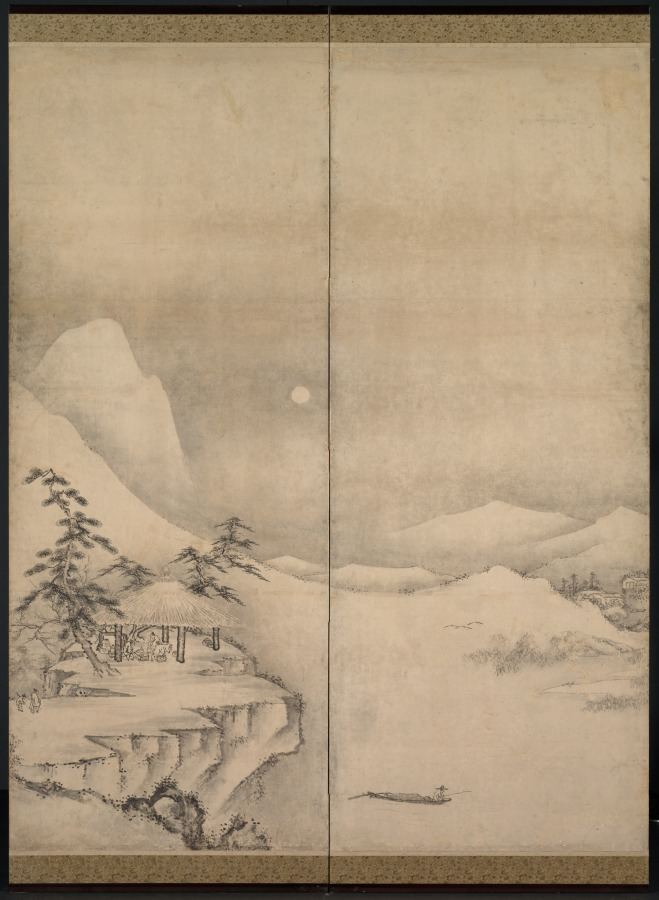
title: Chinese Landscape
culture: Japan, Muromachi period (1392–1573)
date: 1500s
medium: One of a pair of six-fold screens; ink and slight color on paper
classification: Painting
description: In a panorama of mountains and expanses of water, three gentlemen have assembled by moonlight to enjoy one another’s company away from a bustling village. An influx of ink paintings from China in both album and scroll formats beginning in the late 1200s inspired Japanese artists to create landscapes based upon Chinese prototypes. Later, Japanese painters adapted the imagery to the larger format of folding screens, which were used to define spaces in large rooms.